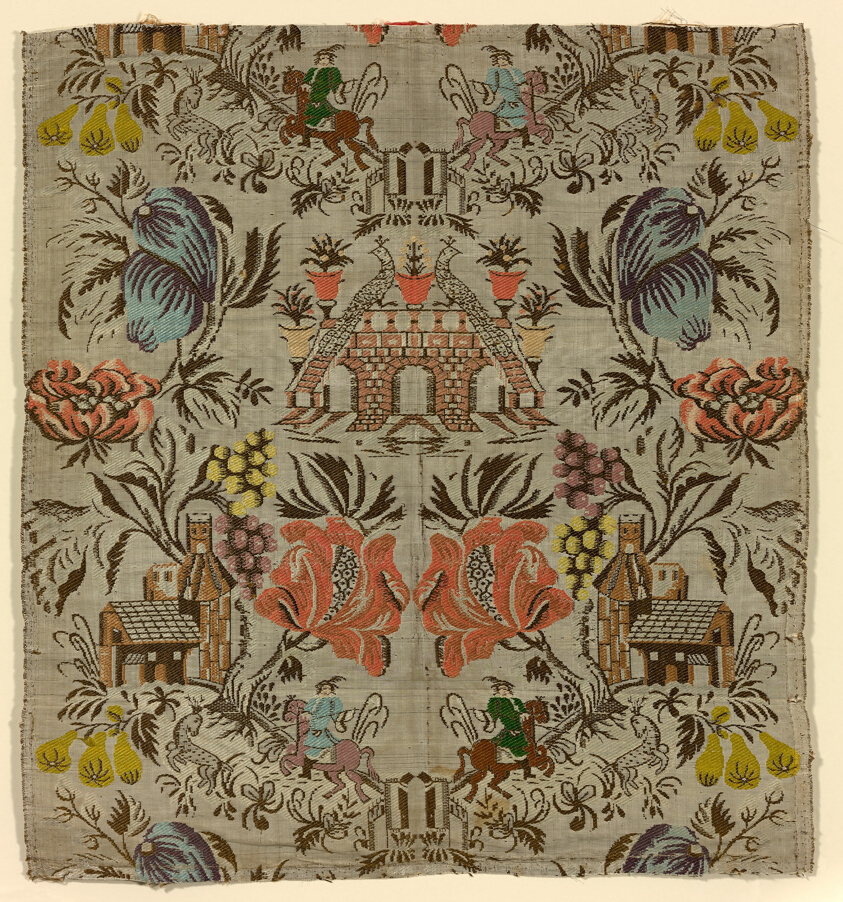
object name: Textile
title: Fragment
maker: France (provincial) or Northern Italy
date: c. 1740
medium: Silk, plain weave with supplementary brocading wefts and self-patterned by two-color complementary ground wefts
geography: France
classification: textile; weaving